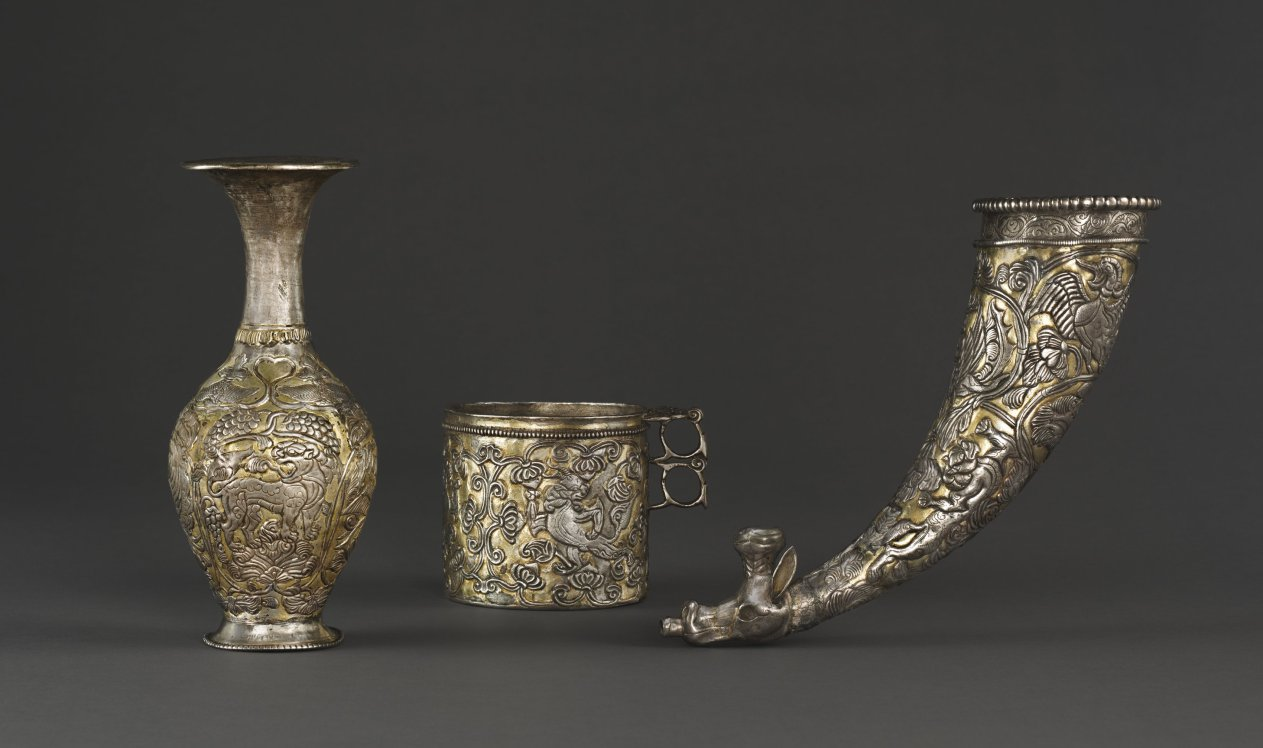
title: Rhyton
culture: Central Asia (Sogdiana) or Tibet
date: c. late 600s–early 700s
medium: silver with gilded foil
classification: Silver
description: The form of the animal-headed rhyton as a drinking vessel and the use of silver are evidence of cultural exchange with Persia, while the lush, luxurious quality of the design and the form of the lions and curling dragon on one side of the decanter reveal an awareness of Chinese forms. Poured into the large opening at the top of the horn, wine then flowed out through the small tube held between the parted lips of a bovine-like animal. To keep from spilling, drinkers could stop the flow of the liquid by holding a thumb over the lower aperture.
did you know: This drinking horn was a communal vessel which guests would pass around to share wine at parties.